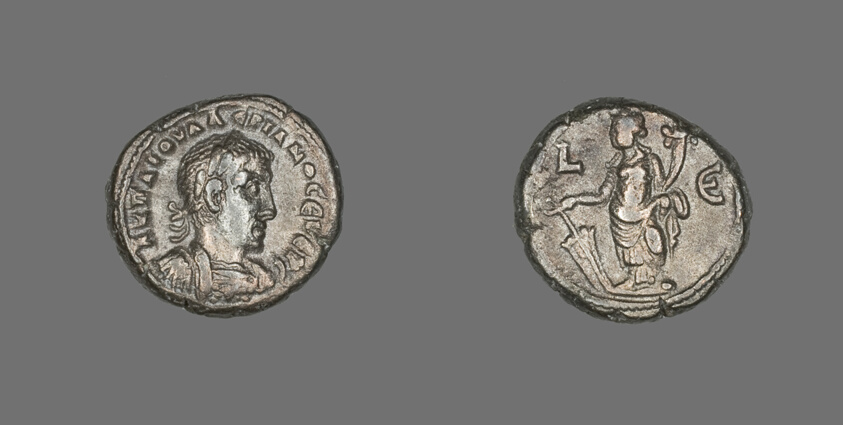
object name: Coin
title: Coin Portraying Emperor Valerian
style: roman period (egyptian), greco-roman (egyptian)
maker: Roman, minted in Alexandria, Egypt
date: 257-258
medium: Billon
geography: Egypt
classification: coin; ancient art